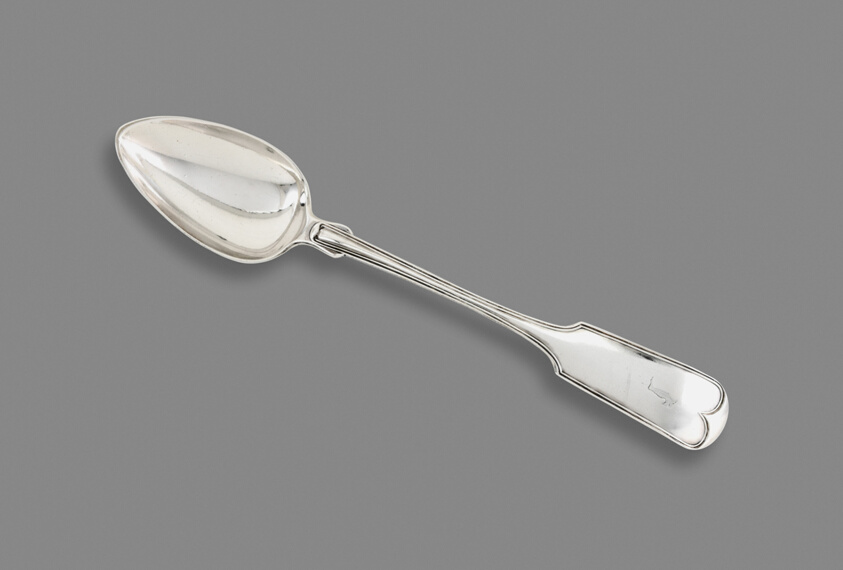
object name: Metalwork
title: Serving Spoon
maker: Bailey & Kitchen; American, c. 1832–1846; Philadelphia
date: c. 1832–46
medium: Silver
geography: Philadelphia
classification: utensil for serving food; utensil; spoon; silver; american decorative arts; american arts; decorative arts